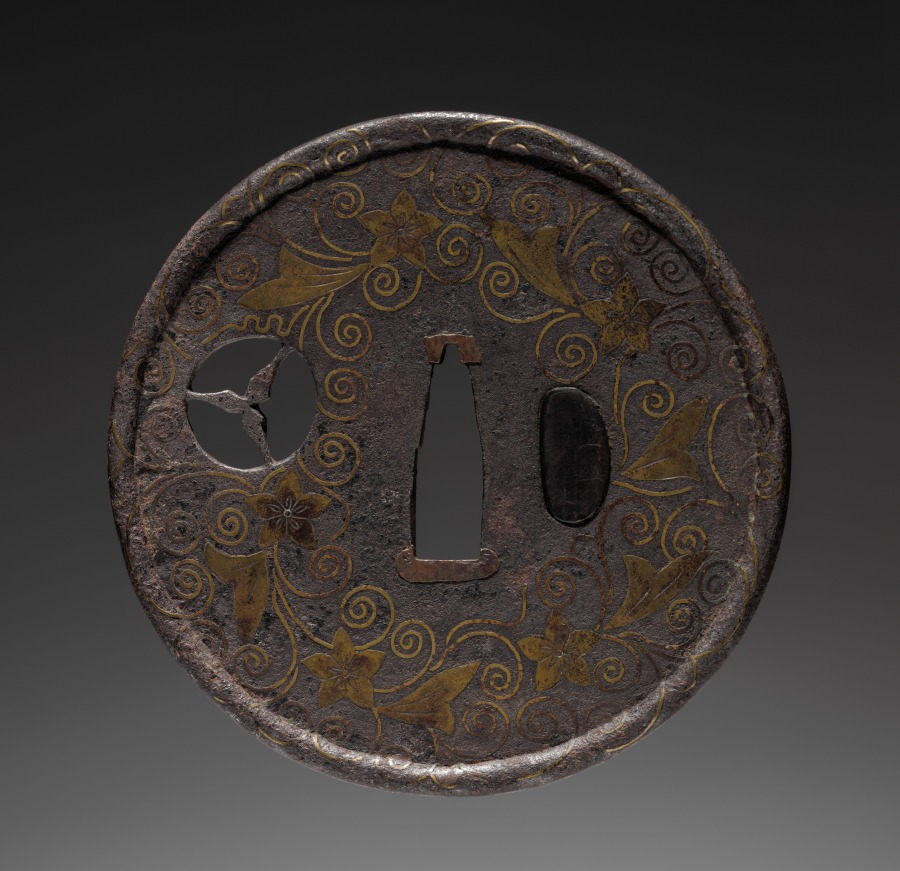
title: Sword Guard (Tsuba)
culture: Japan, possibly Edo period (1615-1868)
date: c. 1615–1868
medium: iron with brass inlay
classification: Arms and Armor